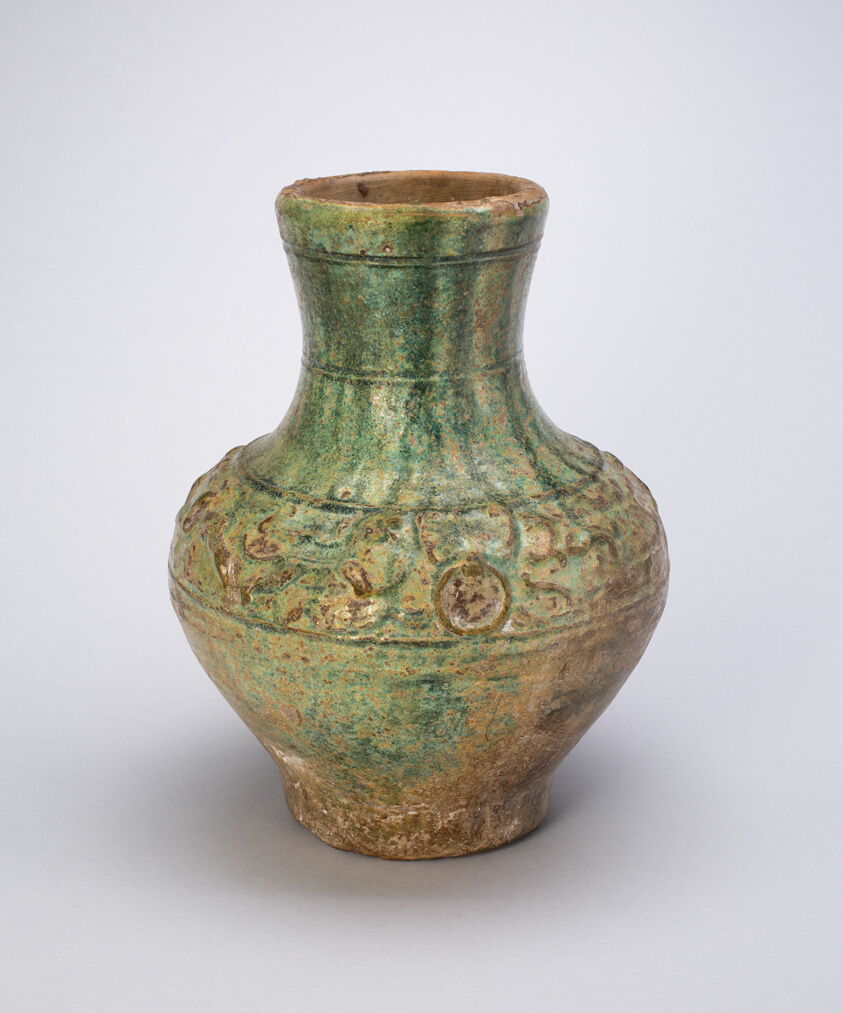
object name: Vessel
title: Jar with Mock Loop Handles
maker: China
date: Han dynasty (206 B.C.–A.D.220)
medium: Earthenware with green lead glaze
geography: China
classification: ceramics; asian art; vessel